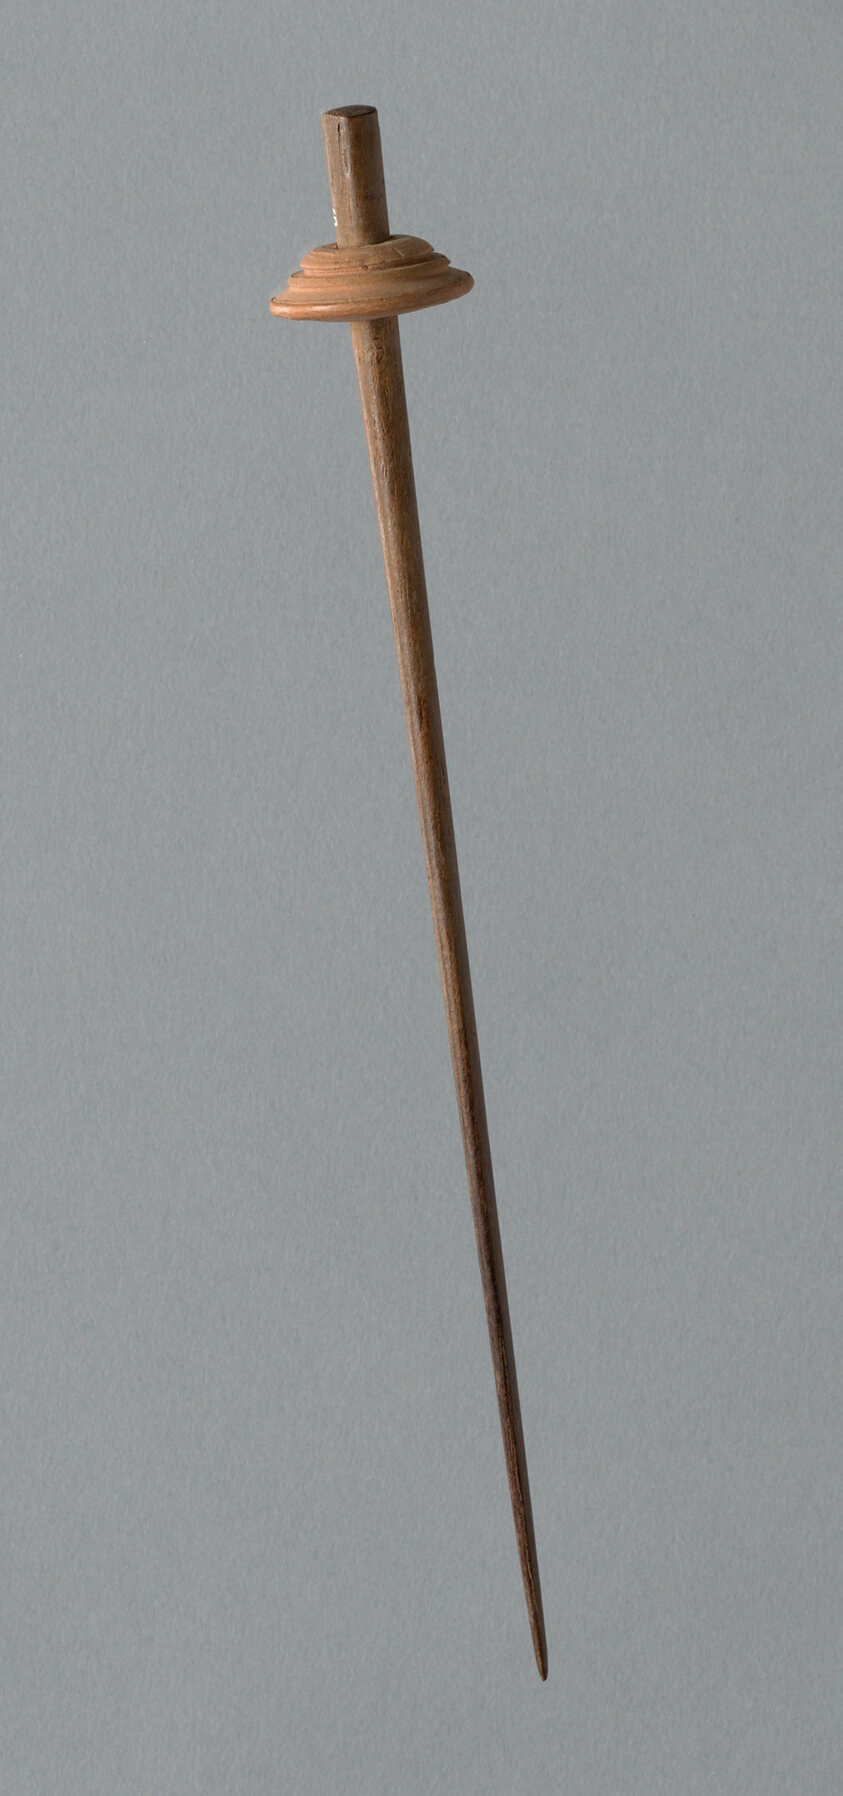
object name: non-art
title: Wooden Spindle with Ceramic Whorl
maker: Peru, Possibly central coast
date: 1000/1476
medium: Wood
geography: Peru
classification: spindles (textile working equipment); textile working equipment; accessories (object genre); textile